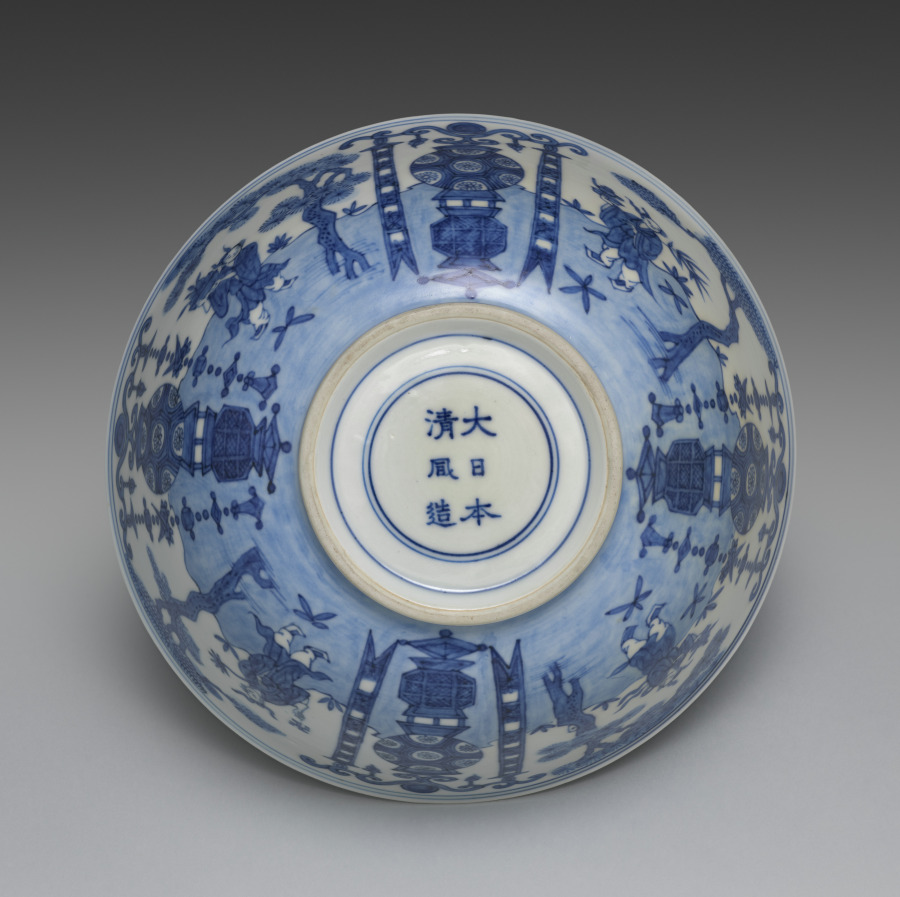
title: Bowl from Nesting Bowls with Daoist Immortals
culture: Japan, Meiji period (1868–1912)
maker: Seifū Yohei III (Japanese, 1851–1914)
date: 1893–1914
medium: Middle bowl from a set of three bowls; porcelain with underglaze blue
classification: Ceramic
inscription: 大日本清風造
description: Yohei III was capable of ink painting–like compositions in underglaze blue, as well as more decorative ones like that on this set of three nesting bowls. Bowls with very similar designs in five colors were produced in the reign of the Wanli emperor (r. 1572–1620 ) during the Ming dynasty, and Yohei must have had direct access to one of these or to a close copy. A scene of Daoist immortals is presented on the bowls. On each one, the ground plane is defined with a blue wash. Four lanterns are evenly spaced around the bowl. Two are flanked with linked-piece metalwork banners of the seven treasures. The alternate altars are adorned with textile banners. In between them are four immortals, each standing beneath a tree with small plants surrounding his feet. Two of the immortals hold fruit on a tray. Another carries an elixir-filled ewer and a willow branch. The fourth holds a swastika (manji), here an auspicious symbol, and a flower. Curiously, the inscription inside each footring reads “Made by Seifu of Great Japan,” in emulation of the dynasty and reign inscriptions that appear on Chinese ceramics; but one can also see through the translucent glaze another inscription, “Seifu Yohei,” written in large characters within a double band of blue on the largest bowl.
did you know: In the bottom of each bowl is a scene of two robed immortals who appear to stand on a precipice in a mountainous landscape high in the clouds, with celestial orbs over their heads.